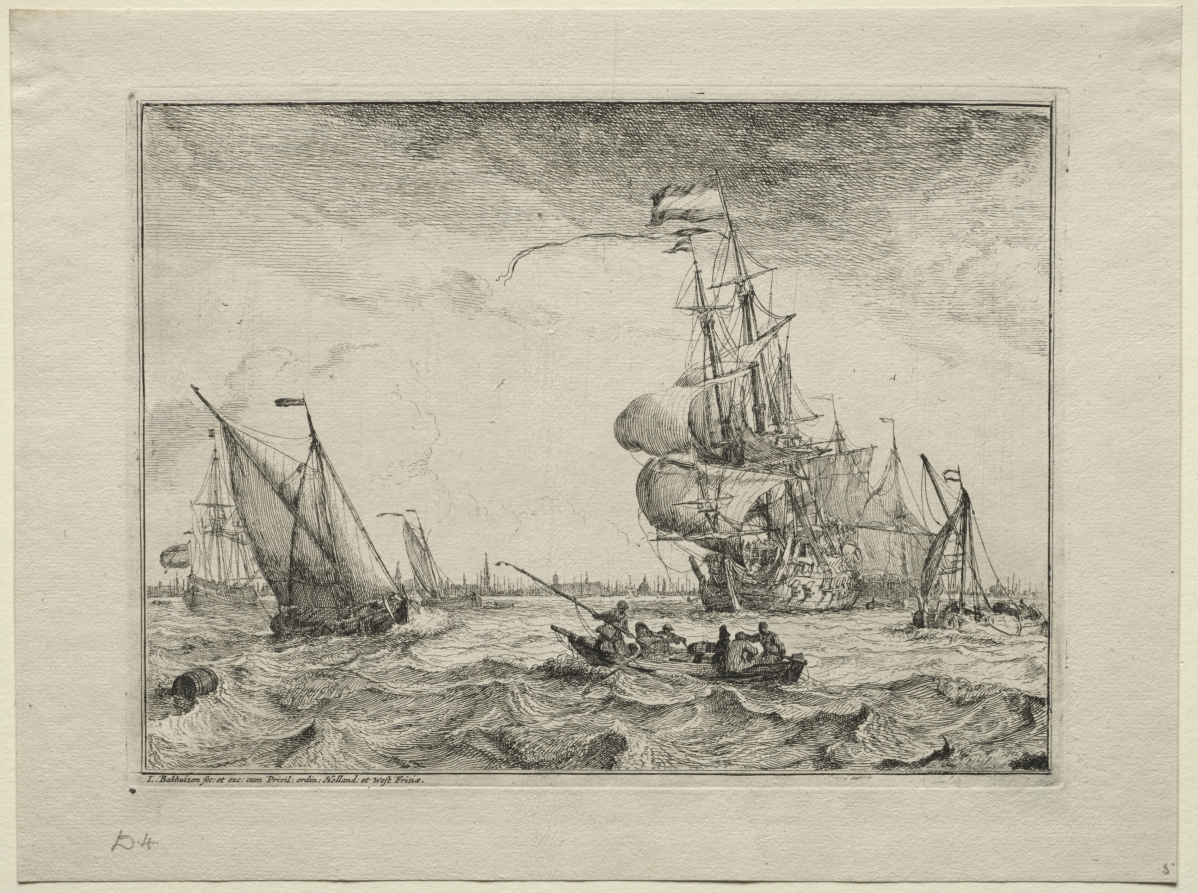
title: Ships Under Full Sail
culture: Netherlands, early 18th century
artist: Ludolf Backhuysen (Dutch, 1631–1708)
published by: Ludolf Backhuysen (Dutch, 1631–1708)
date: 1701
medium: etching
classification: Portfolio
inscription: center, on small flag, in plate: LB[in reverse] ; lower left, in plate: L. Bakhuizen fec: et exc: cum Privil: ordin: Holland: et West Frisiæ. ; lower left, in graphite: D. 4 ; lower right, in graphite: 5